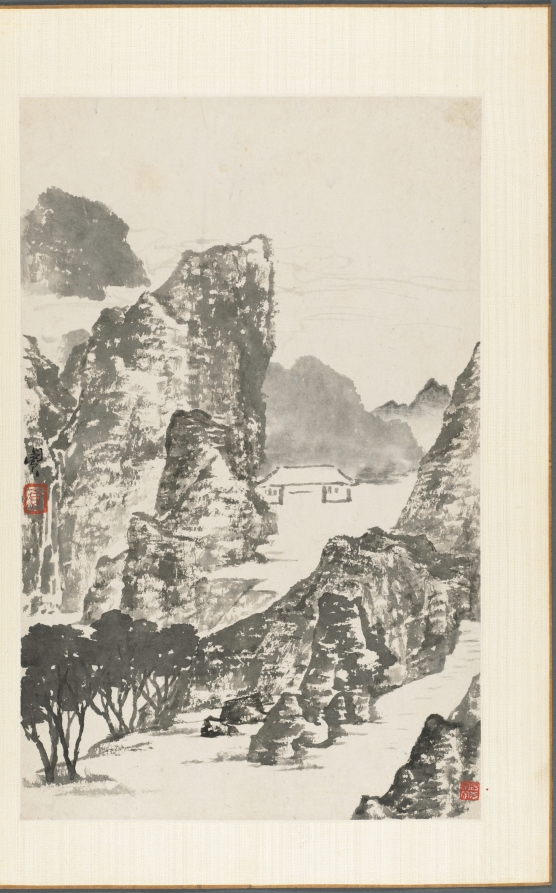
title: Landscape after Mi Fu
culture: China, Qing dynasty (1644-1911)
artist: Min Zhen (Chinese, 1730–after 1788)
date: 1788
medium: album leaf, ink on paper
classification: Painting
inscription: Inscription by Min Chen on the last leaf: I have a habit of collecting strange rocks. My friend Tai-li shan-jen* treasures my paintings as much as I treasure strange rocks. Once we agreed to exchange what we love with each other. However, my busy activities have kept me from carrying this out. This summer I realized that this strange rock has been sitting in my studio for five years, so I painted this to fulfill my old promise. As a record, I chose the grotesque cliff in the last scene of this twelve-leaf album. Cheng-chai, Min Chen inscribed this on the sixth day of the sixth month [July 9] of the wu-shen year [1788]. * Tai-li shan-jen is Wang Li [tzu: Li-fu] tr. Hou-mei Ishida Six seals appearing on the leaves: Min Chen, Cheng-chai, Ching-ch'iao, Chen, Liao-t'ang, Min Chen chih-yin.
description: Min Zhen, who was orphaned at age 12 and developed an eccentric personality, was trained by Tang Yin (1682–1756), a writer, playwright, and superintendent of the imperial porcelain workshops in Jingdezhen. The connection to him may have enabled Min to stay in Beijing for a decade from around 1773. It is not clear whether he ever resided in Yangzhou, but his style is in many instances reminiscent of that of Yangzhou artist Huang Shen. This album demonstrates Min’s versatility and mature style in the last years of his life.